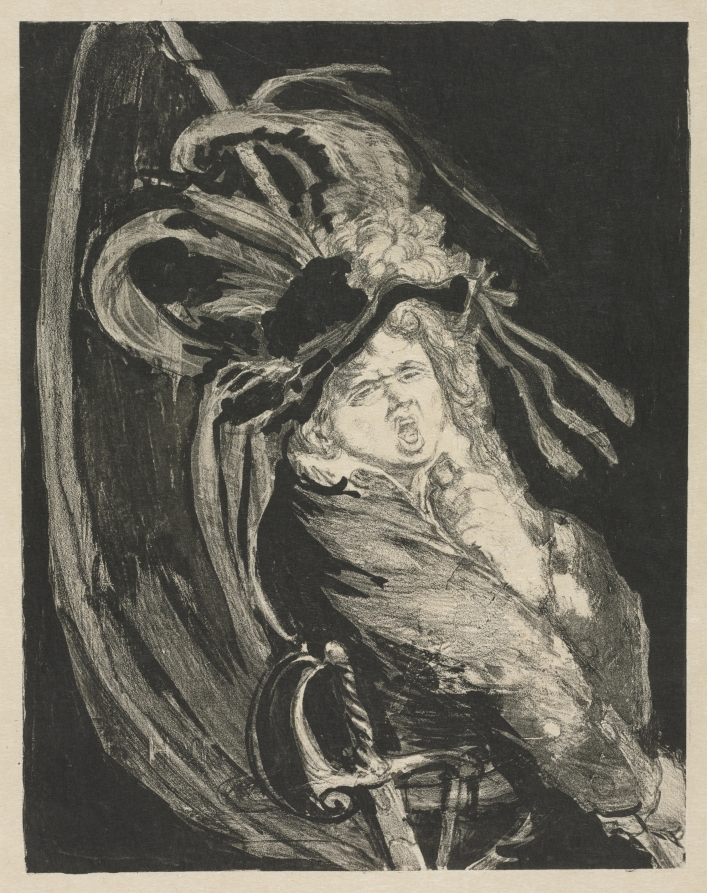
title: Standard Bearer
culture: Belgium, 19th century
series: Published in L'Estampe Originale, Album IV, 1893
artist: Henri de Groux (Belgian, 1867–1930)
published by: Andre Marty (French, b. 1857)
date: 1893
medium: lithograph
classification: Print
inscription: lower right, in graphite: Henri De Groux; lower left margin, in graphitel: 14